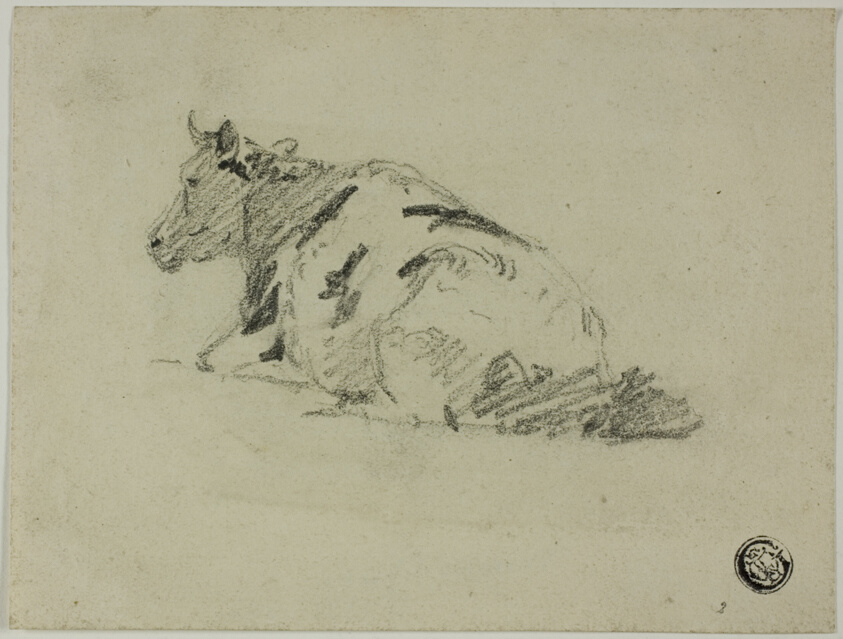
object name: Drawing and Watercolor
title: Cow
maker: Attributed to Thomas Girtin; English, 1775-1802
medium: Graphite on cream wove paper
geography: England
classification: graphite; drawings (visual works); prints and drawing